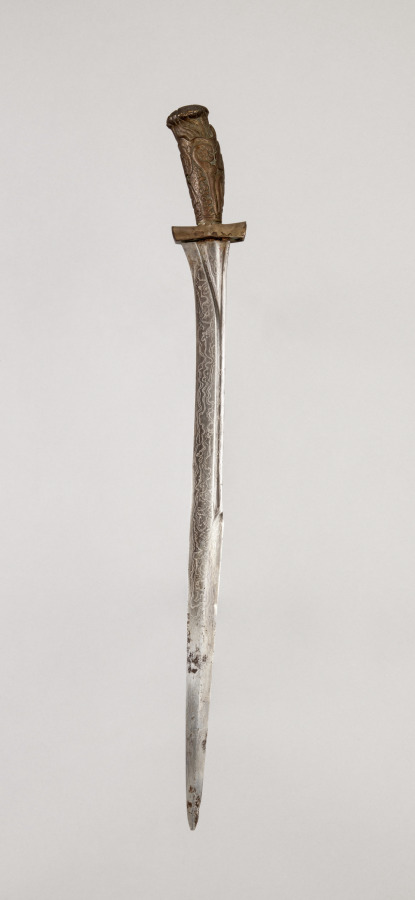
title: Sword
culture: Java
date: 1800s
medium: iron and silver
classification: Arms and Armor